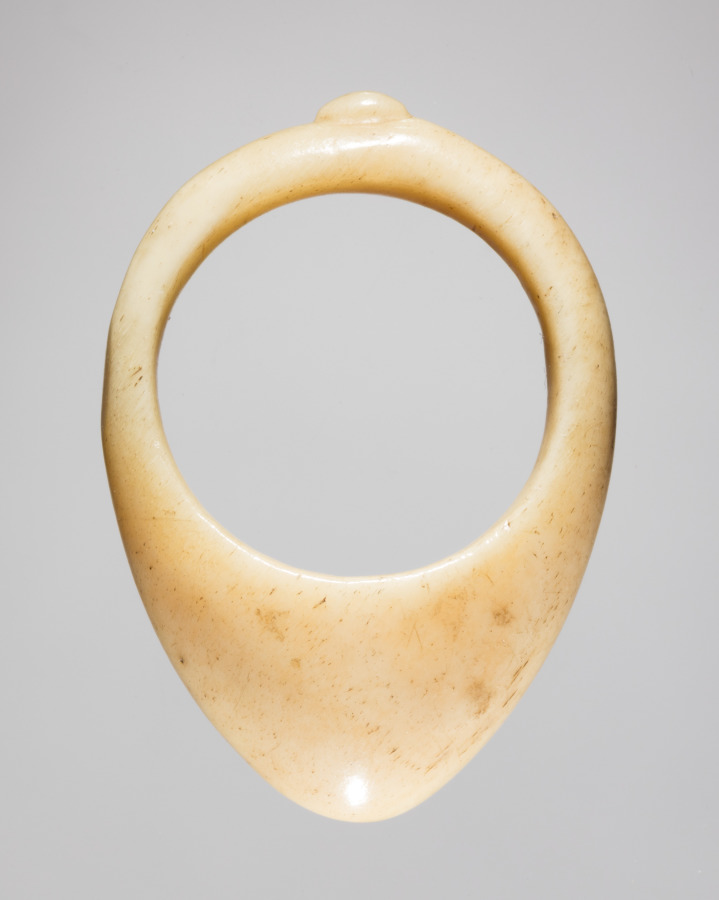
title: Ring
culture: Iran, early Islamic period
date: 700s - 900s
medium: bone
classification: Miscellaneous